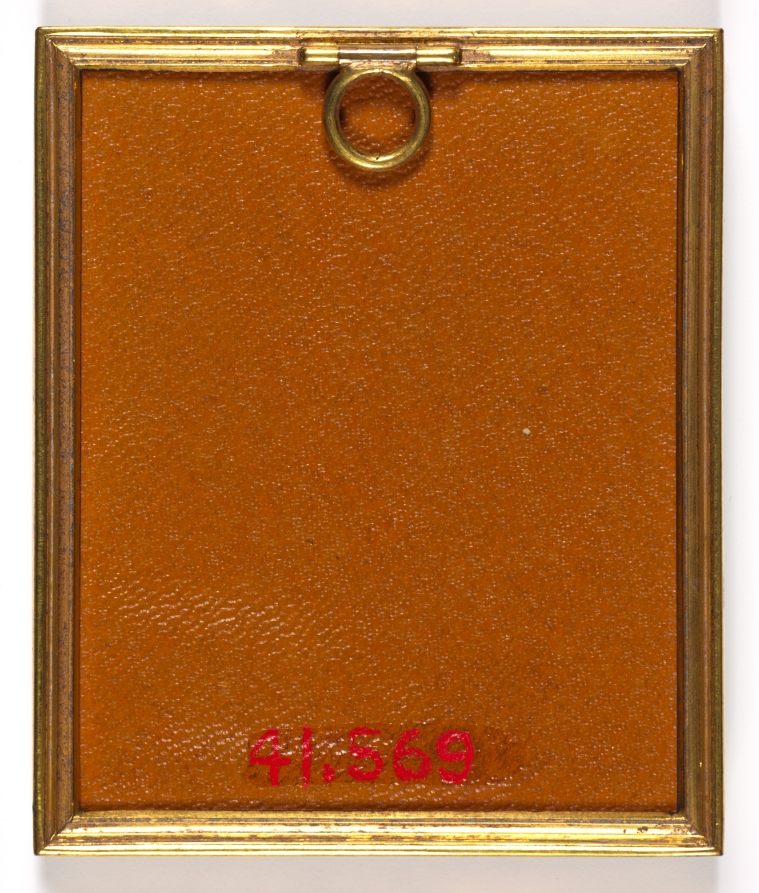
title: Portrait of a Woman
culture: England, 18th century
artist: John I Smart (British, 1741–1811)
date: c. 1772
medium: graphite and wash on laid paper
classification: Portrait Miniature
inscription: inscribed on paper backing: in graphite, upside down at top: 134; in graphite on slant below center: Eleanor of / Spain; on the inside of the outside backing, in center in graphite: M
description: Although it is impossible to say if it was always part of the artist’s process to execute a preparatory sketch prior to painting each miniature, we do know that John Smart retained many hundreds of these sketches. A group of preparatory sketches—of which this portrait is one—descended through the Smirke family after Smart’s daughter Sarah gave a sketchbook containing preparatory portrait studies to her friend Mary Smirke, sister of the celebrated Victorian architect Sydney Smirke. This book was probably broken up around 1877 when it was divided between Sydney’s daughters Mary Jemmett and Mrs. Lange, whose portions were both sold at auction in 1928. This portrait was assigned the historically colorful but fictitious title of “Eleanor of Spain” at some point after memory of its true identity had been lost. Giving illustrious titles to portraits of unknown sitters was a popular strategy adopted by dealers during the nineteenth and twentieth centuries, often applied to miniature portraits and, in particular, to Smart’s sketches of women. The inscription on the paper backing is not in Smart’s hand, and when the paper backing was removed in 1993, no inscriptions were discovered on the back of the drawing itself. Only the sitter’s head and neck are drawn, and a low-necked dress is faintly suggested. Her head is turned to the right, and her light-colored hair is dressed high, with flat curls against the back of her head. She has blue eyes, and the color of her lips is extremely faded, as is the miniature overall. The sitter’s sagging jaw line and the lines beneath her eyes suggest that she was painted as a mature woman. The background is unpainted. A photograph of this sketch in Edward Greene’s notebook indicates that at one time “134” was inscribed on the front in the upper right corner. To this date, the finished ivory for which this preparatory sketch was presumably undertaken has not been discovered. A miniature from the Nelson-Atkins Museum of Art’s Starr collection, while probably not this sketch’s finished ivory counterpart, is closely related in style and date. The Nelson-Atkins unidentified sitter’s veiled hairstyle, position of the head in relation to her squared shoulder, and plump jaw line are identical to the Cleveland sketch. During this stage of Smart’s career, the sitters’ heads were often rather large in relation to their bodies.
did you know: Sketches helped John Smart work out the particulars of a portrait before commencing the miniature on ivory; they were useful in the event that a duplicate might later be required.